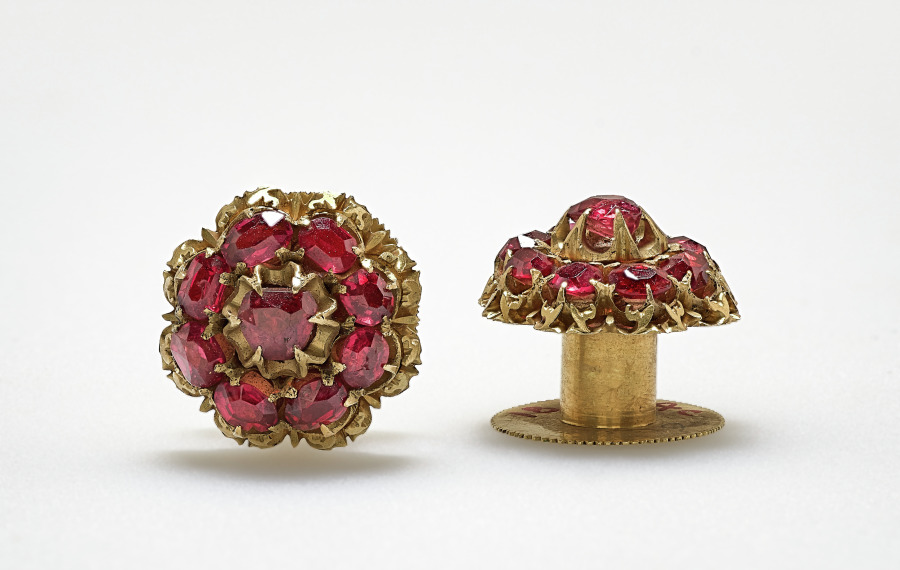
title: Pair of Earrings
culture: Burma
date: 1800s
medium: gold and rubies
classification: Jewelry